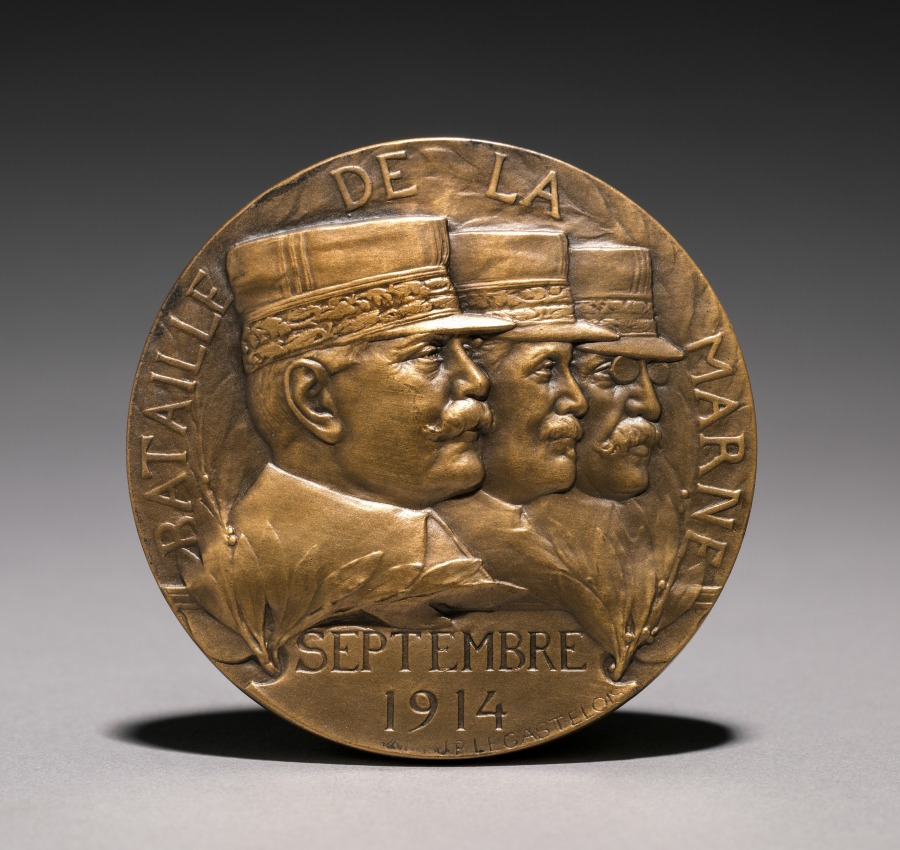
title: Medal (reverse)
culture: France, 20th century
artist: Jules Prosper Legastelois (French, 1855–1931)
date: 1914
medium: bronze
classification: Metalwork